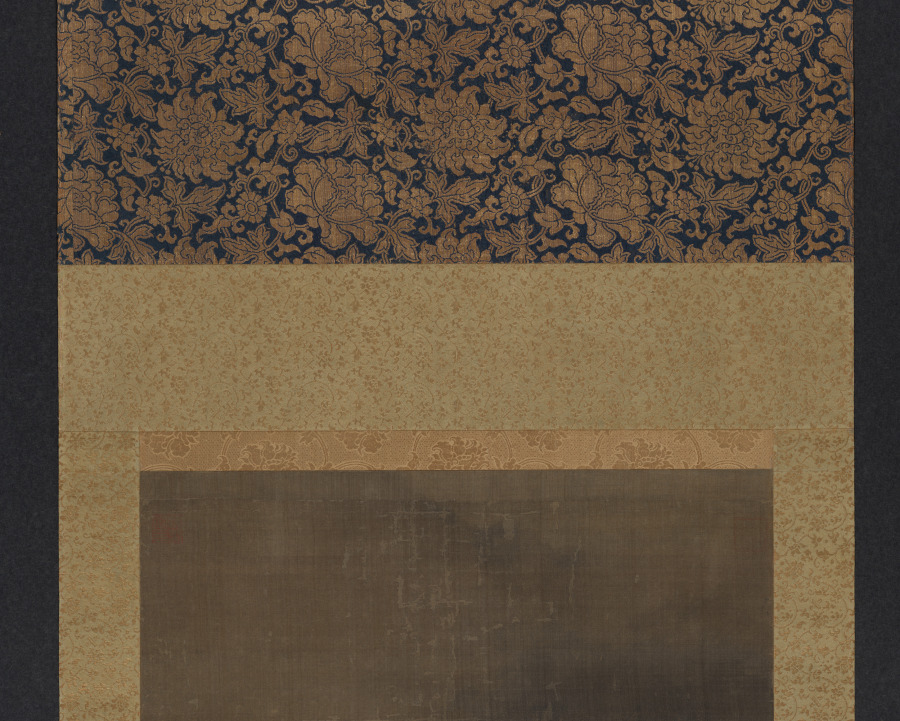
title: Dragon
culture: China, Southern Song dynasty (1127-1279)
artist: Fachang Muqi (Chinese, 1220–1280)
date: c. 1250–79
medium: Hanging scroll; ink on silk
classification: Painting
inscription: 道有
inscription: 雜華室印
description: The dragon and tiger are tied to the philosophical concept of yin and yang, which describes opposite but complementary forces. The dragon occupies a tiered background of waves and mist. Its luminous head emerges from the darker passages, and its narrow twisting body is serpent-like. By contrast, the close-up view of the tiger emphasizes its bulk. The tiger bends its head to lick its paw while its tail curls in the foreground. In their original Chan Buddhist context, this pair of scrolls likely flanked a central image, like the Bodhisattva Guanyin. The silk has darkened over the centuries, and the slight reddish shading in the tiger’s tongue and nose has faded.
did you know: Fachang Muqi was a Chinese Chan Buddhist monk and painter.